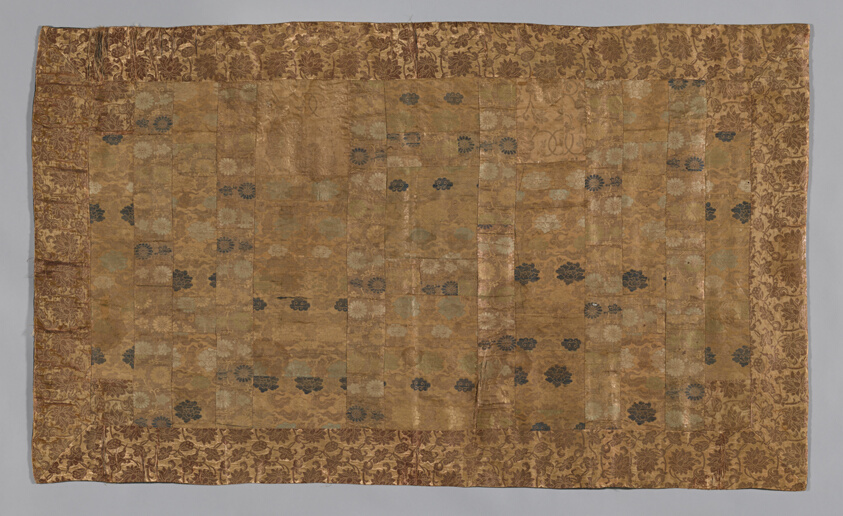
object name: Textile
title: Kesa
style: edo (japanese period)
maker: Japan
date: 18th century, Edo period (1615–1868)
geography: Japan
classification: textile; costume; liturgical - buddhist; weaving